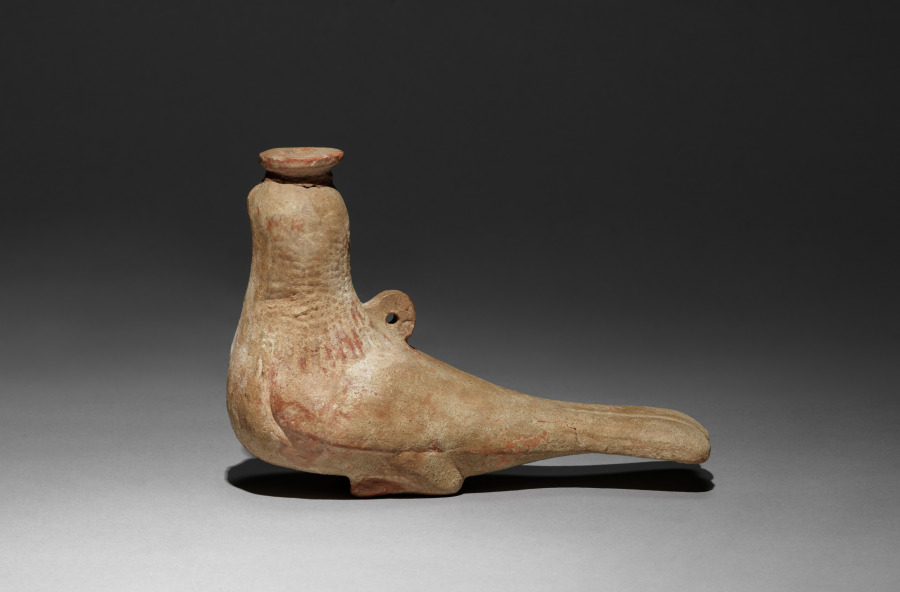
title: Siren-Shaped Perfume Flask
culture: Greece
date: 600–480 BCE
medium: terracotta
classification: Sculpture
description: A half-bird, half-woman creature, a siren lured sailors to death by the sweetness of her song. The most famous sirens appear in the ancient epic the Odyssey. Shaped like a siren, this vessel likely held valuable perfumed oil. Its small mouth limited spillage, and a string attached to the loops on its back allowed it to hand or hold a stopper.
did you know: In the Odyssey, Odysseus’s crew escapes the sirens by plugging their ears with wax.